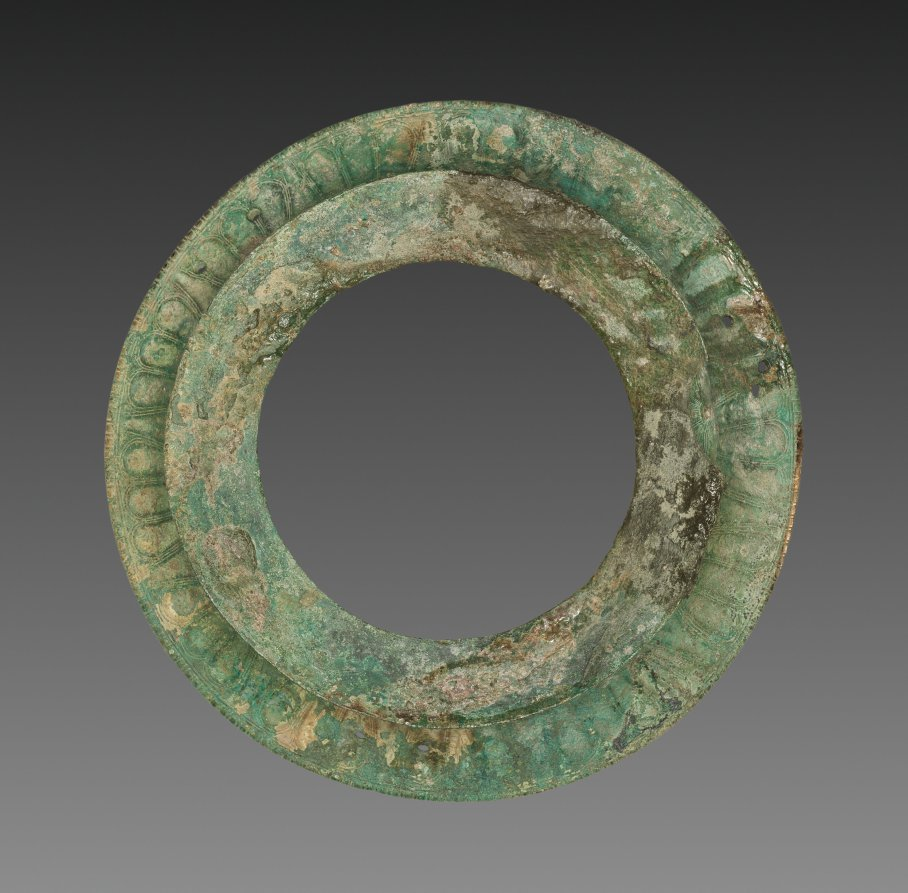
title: Bronze Volute Krater Base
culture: Greece, Laconia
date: late 600s BCE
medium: bronze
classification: Metalwork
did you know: This object supported a large vessel used for mixing wine with water called a krater.